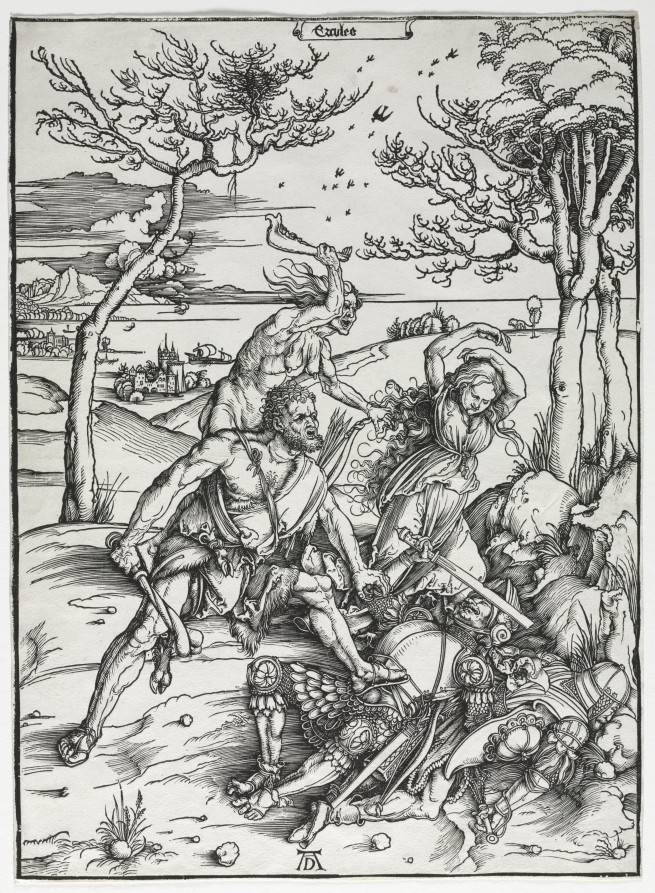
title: Hercules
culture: Germany, late 15th Century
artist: Albrecht Dürer (German, 1471–1528)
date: c. 1496–97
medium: woodcut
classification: Print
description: Even though Dürer entitled this work Ercules, the narrative of the representation remains highly debated. The most recent interpretation suggests that Dürer adapted the scene from an obscure Roman tragedy, one he may have learned through his humanist friends. The story describes how prior to Hercules’ first heroic labor, the goddess Juno incited within him a monstrous rage. This resulted in the killing of a tyrant, seen under Hercules’ left foot, and the murder of his own family, represented here by his frightened wife Megara. A maniacal old woman-a Fury, goddess of vengeance and the embodiment of Hercules’ rage-prepares to assail Megara with an animal jawbone. According to this reading then, women are the source and manifestation of Hercules’ murderous wrath, an obvious contrast to his later heroism.